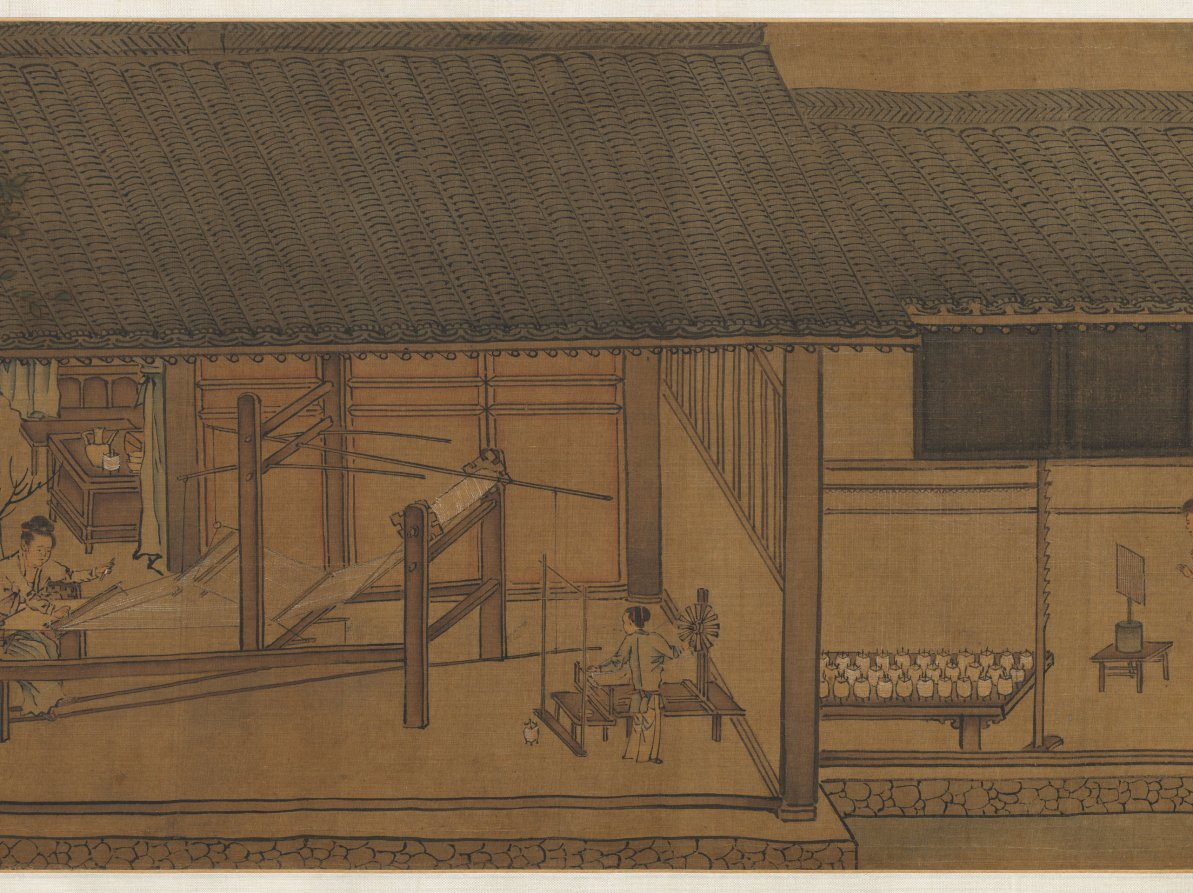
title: Sericulture (The Process of Making Silk)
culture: China, Southern Song dynasty (1127-1279)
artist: attributed to Liang Kai (Chinese, mid-1100s–early 1200s)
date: early 1200s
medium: Handscroll; ink and color on silk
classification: Painting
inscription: 3 colophons and 7 seals of Ch'eng Ch'i (20th c.).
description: By the Southern Song period, the economic center of the silk industry had shifted to the lower Yangzi delta, while the north continued to be troubled by wars. Divided into three sections, the handscroll illustrates 14 steps in the process of making silk, from the raising of silkworms to the weaving of silk cloth. The scroll’s scenes follow the illustrations of Lou Shou’s (1090–1162) Pictures of Tilling and Weaving (gengzhi tu), the first recorded painting of this genre, which was conceived in Hangzhou around 1145. However, in the Cleveland painting the artist groups several scenes of sericulture together under the roof of an open structure.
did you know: The painting is attributed to Liang Kai, a court artist active from about 1201 to 1204 at the Imperial Painting Academy in the city of Hangzhou, a major silk weaving center from that time to the present day.